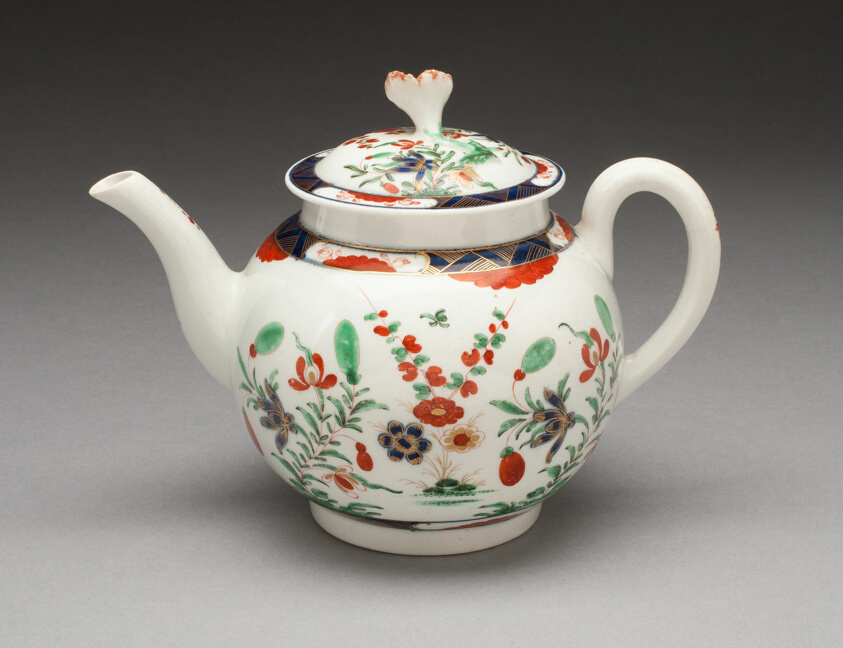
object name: Ceramics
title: Teapot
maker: Worcester Porcelain Factory (Warmstry House Period, 1751–1783); Worcester, England, founded 1751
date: c. 1770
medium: Soft-paste porcelain with polychrome enamels and gilding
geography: Worcester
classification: teapot; teaware; porcelain; european decorative arts; ceramics